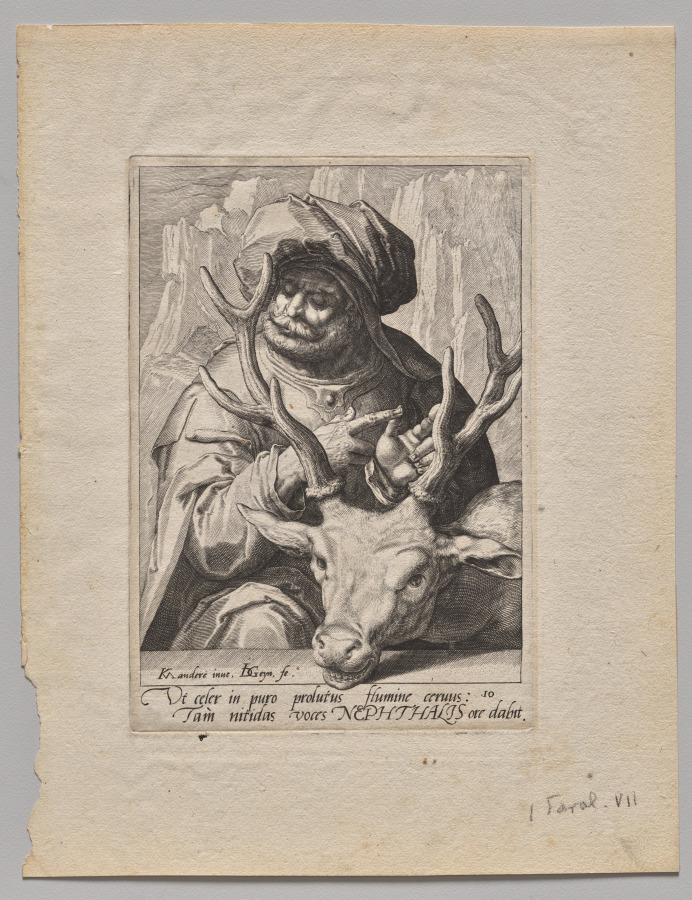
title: Plate 10: Naphtali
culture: Netherlands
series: The Twelve Sons of Jacob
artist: Jacob de Gheyn II (Netherlandish, 1565–1629)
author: after Karel I van Mander (Netherlandish, 1548–1606)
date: c. 1589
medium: engraving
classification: Print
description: In this print, biblical figure Naphtali counts with his fingers next to a stag, denoting his swiftness in battle. This is one of a series of prints depicting the twelve sons of Jacob, each with an attribute and costume that denotes his character. According to the Old Testament, Jacob blessed each of his twelve sons, prophesizing the destiny of their tribe, and assigning them a parcel of land in Canaan. The print series was made in the Netherlands in the late 16th century, a time of political struggle when Old Testament heroes were popular exemplars of fortitude and patience.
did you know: The mountain face depicted in the background of this image may refer to the tribal lands in Northern Israel granted to Naphtali by his father, Jacob, which included a mountain pass.